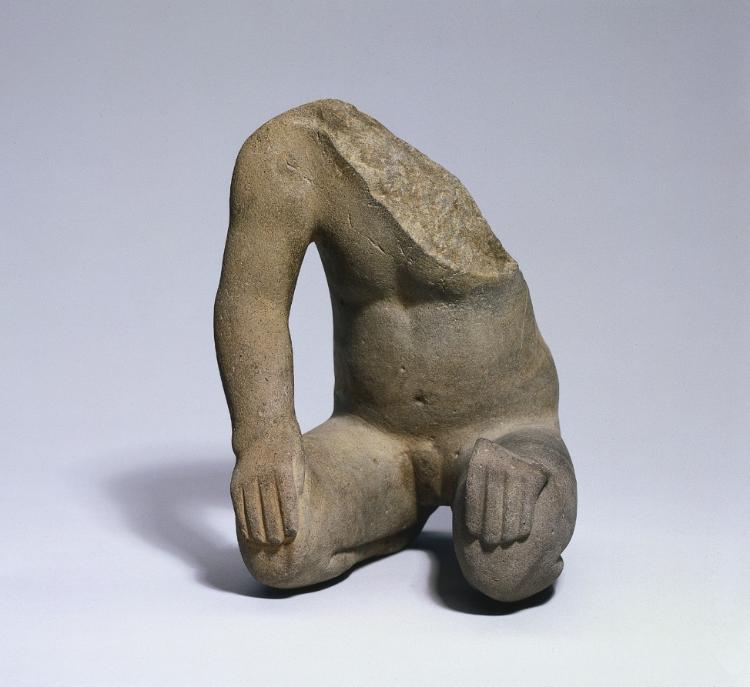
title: Kneeling Figure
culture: Mexico, Guerrero, Olmec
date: c. 1200–600 BCE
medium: stone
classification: Sculpture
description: Outside of the Maya, Olmec sculptures of humans have a naturalism unknown in other Mesoamerican artistic traditions. On this finely carved figure, the musculature of the arms, torso, and legs is carefully depicted, and even the fingernails and toenails and are shown.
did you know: An observant traveler discovered the left knee and hand fragment, orginally missing and now reunited.